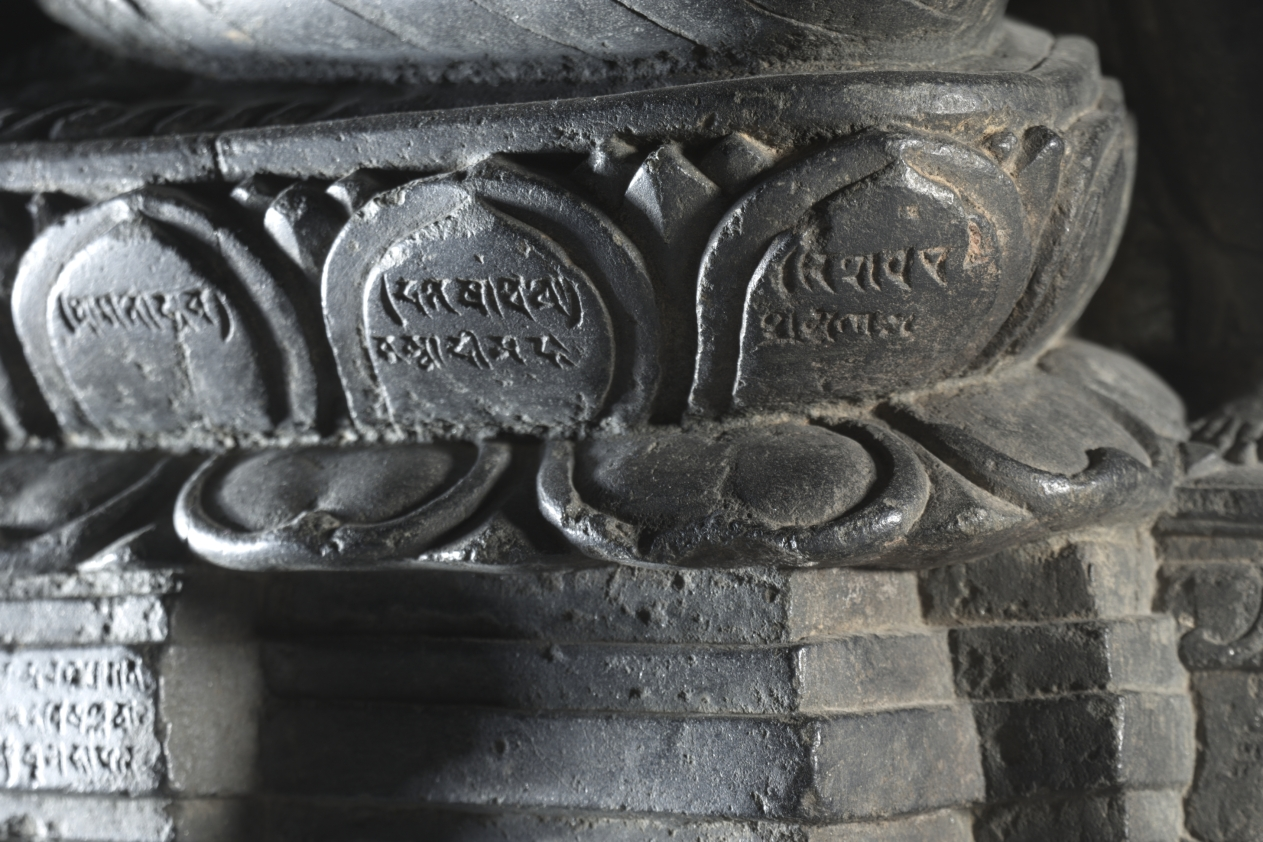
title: Buddha Calling on Earth to Witness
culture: Northeastern India, Bihar, Tetravan, Pala Period (750-1197)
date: 800s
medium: chloritic schist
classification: Sculpture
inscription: Ye dharmā hetu prabhavā tesā hetu tathāgata hya vadat...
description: This sculpture is one of a series that depict the Buddha at different scenes in his life. Here, he is at Bodhgaya, the place where he achieved enlightenment. At the top of the composition are the branches of the ficus tree with its heart-shaped leaves, under which he achieved enlightenment. His hand gesture indicates that he is calling upon the goddess of the earth to witness the moment. During the Pala period of the eighth through 12th centuries in medieval India, Buddhism dominated and flourished in major monastic universities. After the fall of the Pala dynasty, the numerous battles between small kingdoms vying for power caused the destruction of the Buddhist monasteries, and Buddhist monks fled with texts and movable art to Nepal, Tibet, and Southeast Asia, so that by the 14th century, Buddhism was eradicated in India.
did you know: The donors kneel at the lower corners.